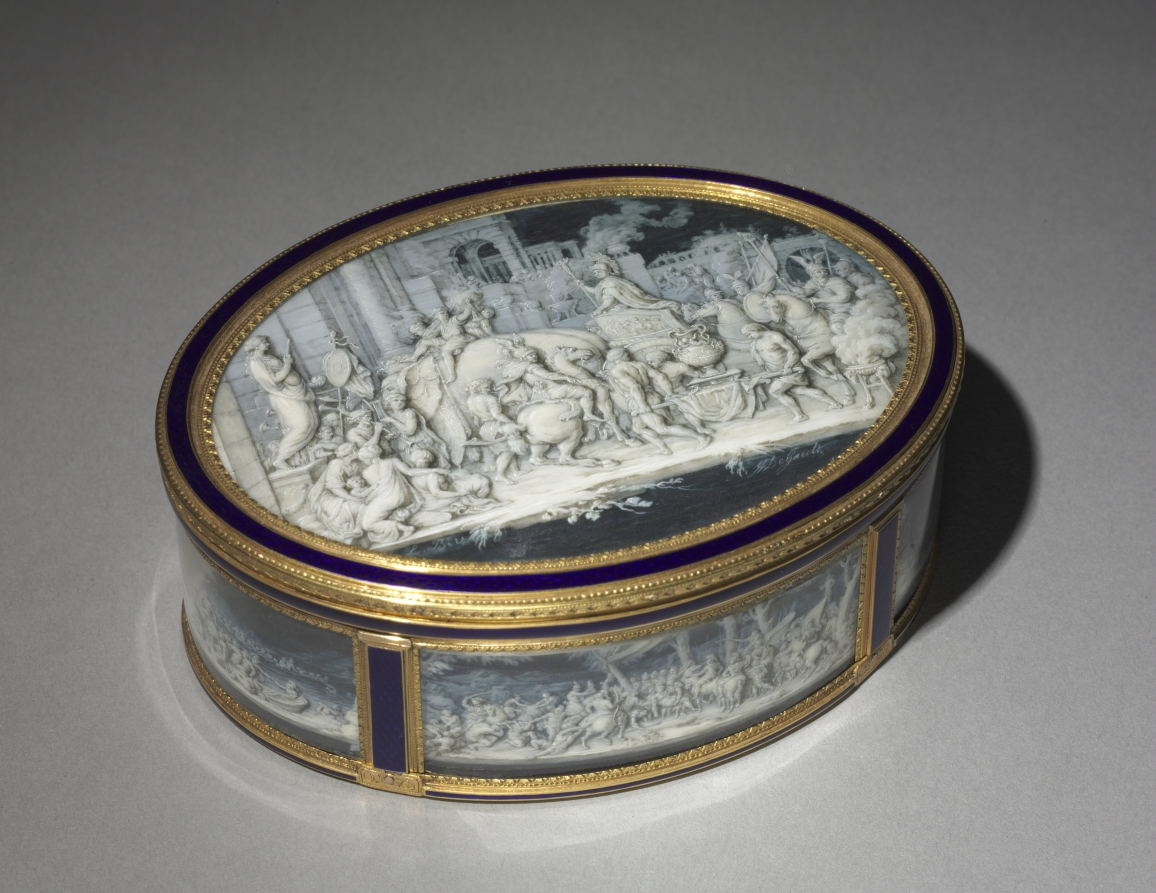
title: Snuff Box (Tabatière)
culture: France, 18th century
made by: Pierre Marie Gault De Saint-Germain (French, 1754–1842)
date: 1779–80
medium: gold and enamel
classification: Miscellaneous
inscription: [Warden's mark for Paris, 1779-1780, inside bottom; inside cover]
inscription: [Illegible maker's mark, inside bottom; inside cover]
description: Decorated with images derived from ancient Greek and Roman history in the style of cameos, intricately carved gemstones, this box evokes the rising neoclassical imagery in France. The scenes on the box recount several key events in the life of Alexander the Great. The enameled works were inspired by a series of prints by Sébastien Leclerc which drew from a series of paintings by Charles Le Brun.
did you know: The original series painted by Charles Le Brun, The Battles of Alexander (Les Batailles d’Alexandre) (1600s), was commissioned by King Louis XIV of France.